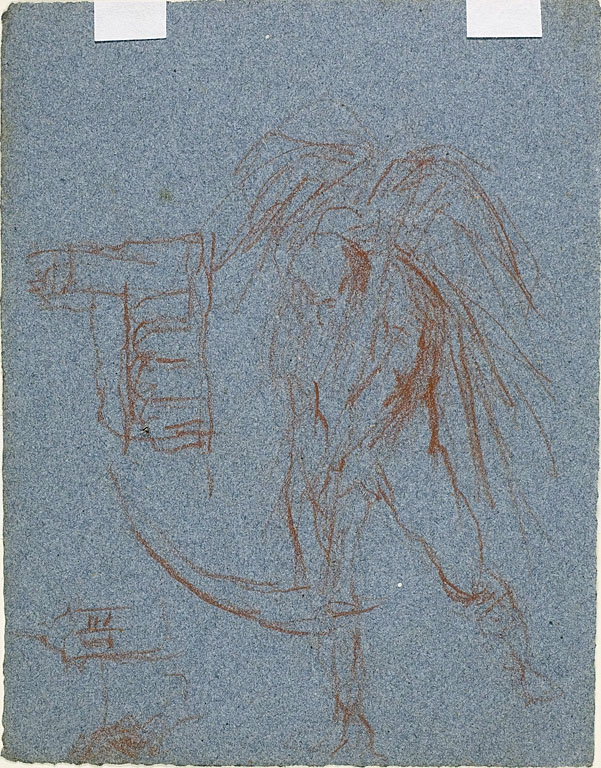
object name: Drawing and Watercolor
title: Two Standing Figures, Embracing (recto); Man with Scythe and Sketches of Buildings (verso)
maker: Jean Baptiste Carpeaux (French, 1827-1875)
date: 1847/75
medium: Red and white chalk (recto); and red chalk (verso), on blue wove paper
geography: France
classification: chalk; drawings (visual works); prints and drawing